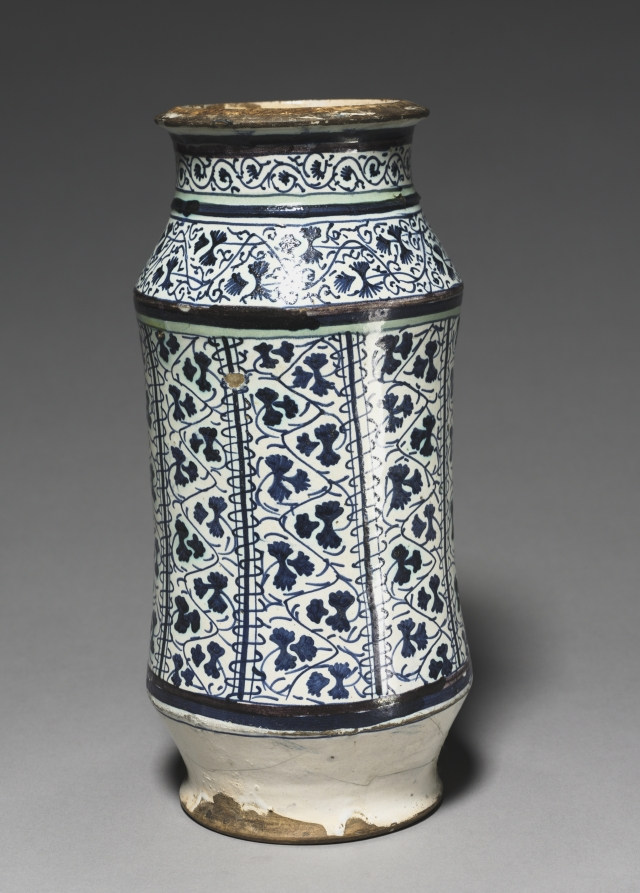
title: Pharmacy Jar (Albarello)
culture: Italy, Tuscany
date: c. 1450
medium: tin-glazed earthenware (maiolica)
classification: Ceramic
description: The albarello—a name of uncertain origin—was a pharmacist's jar used to hold dried herbs or medicinal compounds. It was usually closed by means of a piece of parchment or cloth stretched over its mouth and tied with a string. Its characteristic concave sides offered an easy grip to facilitate handling. This large albarello is one of the best of a small number of exquisitely decorated blue-and-white pieces produced in Tuscany in the mid-1400s.